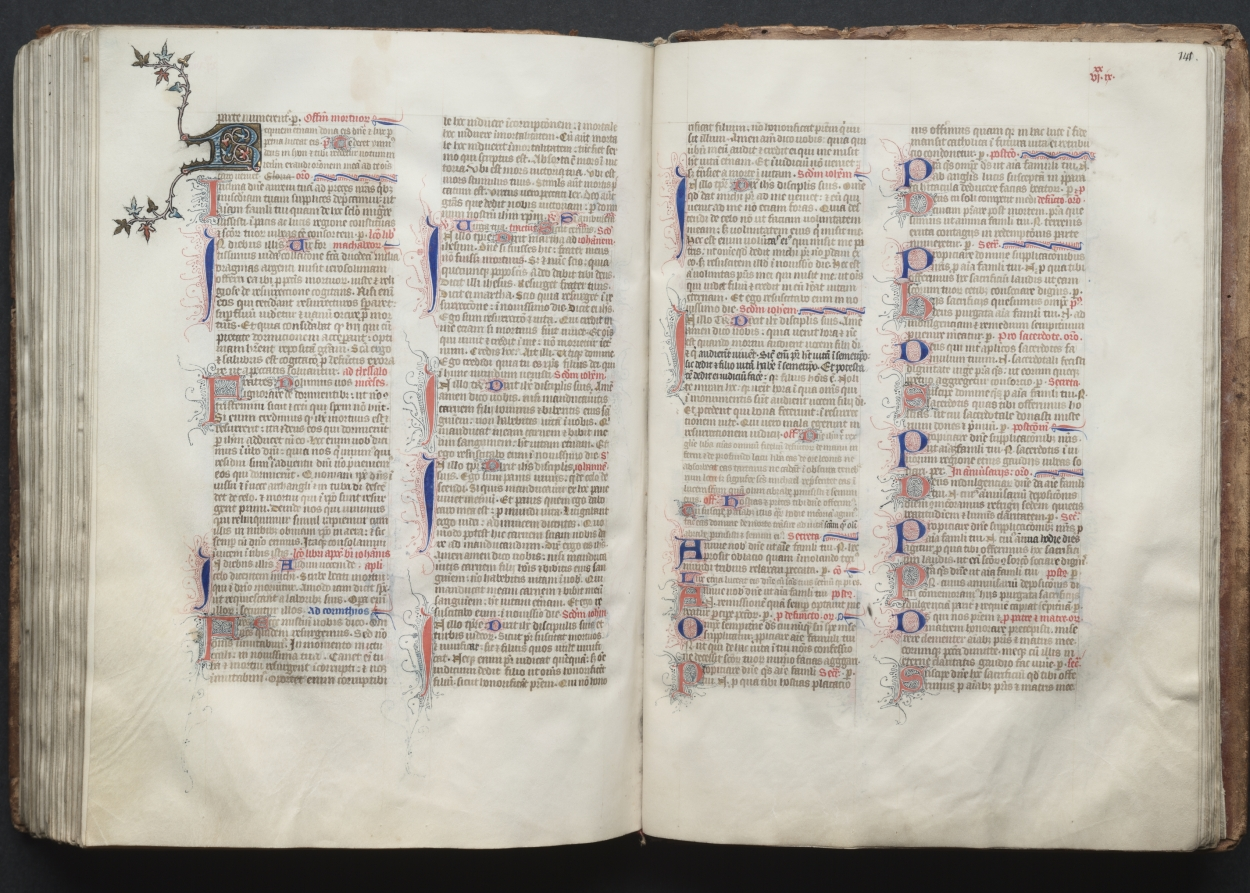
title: The Gotha Missal: Fol. 140v, Text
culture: France, Paris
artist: Master of the Boqueteaux (French)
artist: and Workshop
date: c. 1375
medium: ink, tempera, and gold on vellum; blind-tooled leather binding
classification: Bound Volume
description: The style and quality of this manuscript's decoration is typical of deluxe Parisian books made for aristocratic or royal patrons. Most of the book's decoration appears to be the work of the Master of the Boqueteaux, an artist active at the court of King Charles V (died 1380). His style was apparently shared by a number of book illuminators working in and around Paris. It is very possible that the Gotha Missal belonged to Charles V, but is not provable because the manuscript has no royal portraits and lacks a colophon. Given the book's magnificent decoration, however, it would seem that it was produced for a Valois prince, if not for the king himself. The manuscript receives its name from the German dukes of Gotha, its later owners.